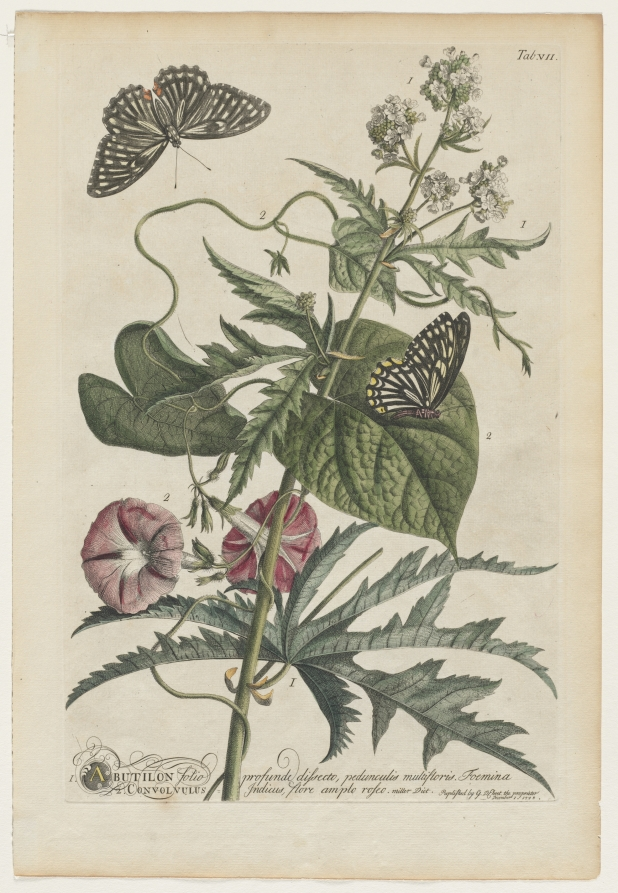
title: Plantae et papiliones rariores: No. 7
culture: Germany, 18th century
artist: Georg Dionysius Ehret (German, 1708–1770)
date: 1748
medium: engraving, hand-colored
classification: Print